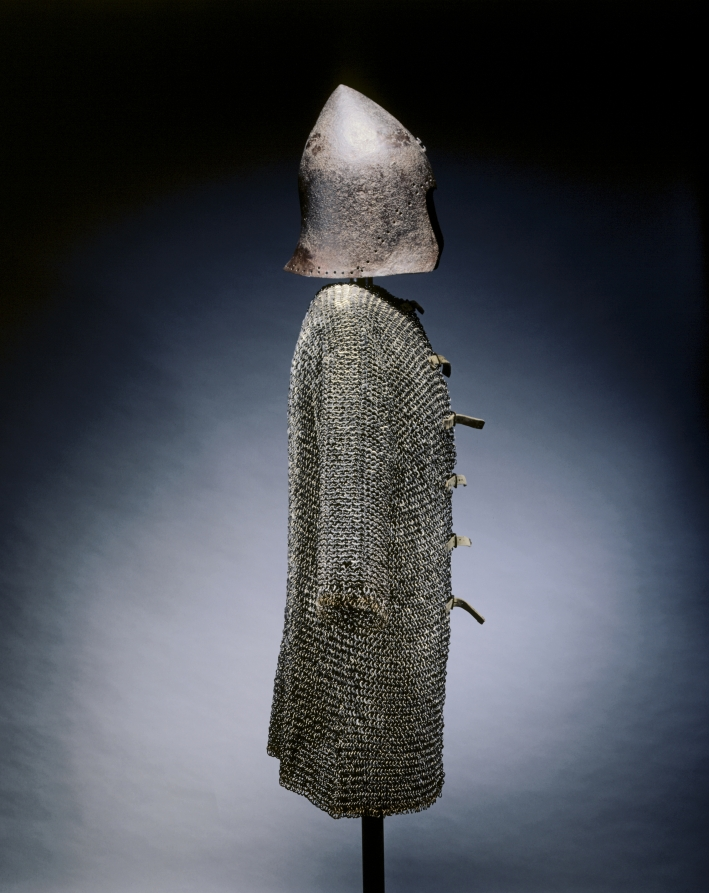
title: Hauberk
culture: Germany (?)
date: c. 1400–1450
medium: steel and brass rings, riveted with modern buckles and straps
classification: Arms and Armor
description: Mail armor was the predominant form of metal body defense for European knights until about 1350. The term derives from the Old French word maille (mesh), implying a protective textile. Each mail garment was constructed of small linked metal rings and "woven" for a specific part of the body. Mail for the torso is a hauberk and typically reached mid-thigh.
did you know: Mail was expensive to make and generally only available to warriors of noble birth unless it could be obtained as war booty.